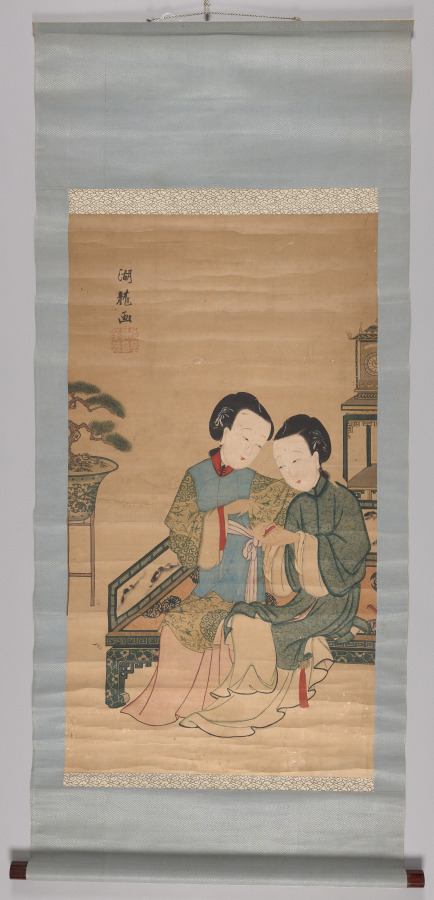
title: Two Beauties Inspect a Golden Lotus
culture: China, Qing dynasty (1644–1911), Qianlong period (1736–95)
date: 1736–95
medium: Hanging scroll; polychrome woodblock print; ink and color on paper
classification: Print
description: In the 1600s, printing flourished in such Jiangnan cities as Nanjing, Suzhou, Hangzhou, and Huizhou, evolving from privately enjoyed illustrated books printed in color to more commercialized single-sheet color prints that were hung on walls and became part of the rich urban visual culture.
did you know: Woodblock printing in color reached a height in China in the 1600s to 1700s. The prints were executed by means of sets of separate blocks, each carved to print a different color.